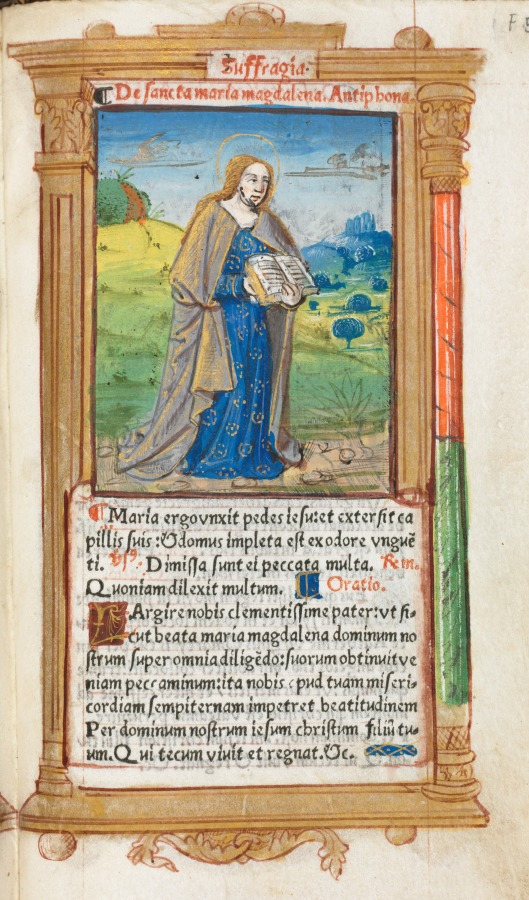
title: Printed Book of Hours (Use of Rome): fol. 109r, Mary Magdalene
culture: France, Paris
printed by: Guillaume Le Rouge (French, Paris, active 1493–1517)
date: 1510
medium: 112 printed folios on parchment, bound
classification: Bound Volume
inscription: Suffragia Ant: Maria ergo unxit pedes Iesu et extersit capillis suis: et domus impleta est ex odore unguenti. V: Dimissa sunt ei peccata multa. Ant: Maria ergo unxit pedes Iesu et extersit capillis suis: et domus impleta est ex odore unguenti. Oratio: Largire nobis clementissime pater quod sicut beata Maria Magdalena dominum nostrum Iesum Christum super omnia diligendo suorum obtinuit veniam peccaminum: ita nobis apud tuam misericordiam sempiternam impetret beatitudinem. Per eundem dominum nostrum Iesum Christum filium tuum. Qui tecum vivit et regnat in…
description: Printed books of hours were produced between 1485 and 1520. Significantly less expensive than handwritten production, printing made books of hours’ popularity soar. More than 1,775 different versions were printed during this time, allowing much customization. This hybrid version has printed text but hand-colored images and comes from Paris, a major center of book production. Open to the suffrages, indicated in red at the top, one page is devoted to Saint Anne and one to Mary Magdalene. Other versions of this book of hours have less color and attention to detail, indicating a higher price paid for this edition.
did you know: A typical book of hours contains around a dozen suffrages, also known as memorials, from the Latin memoriae.